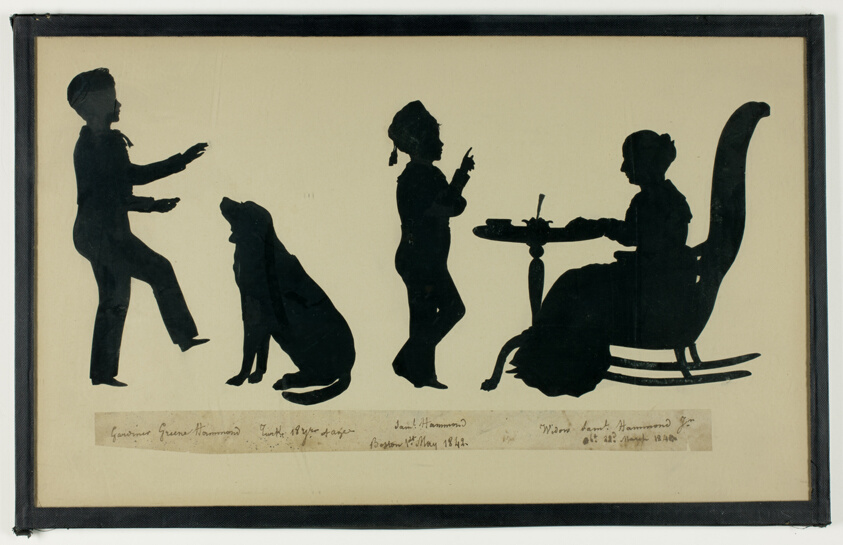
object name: Drawing and Watercolor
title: Silhouette of Hammond Family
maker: Auguste Edouart (French, 1789-1861)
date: 1842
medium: Cut paper silhouette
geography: France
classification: silhouette; prints and drawing; paper